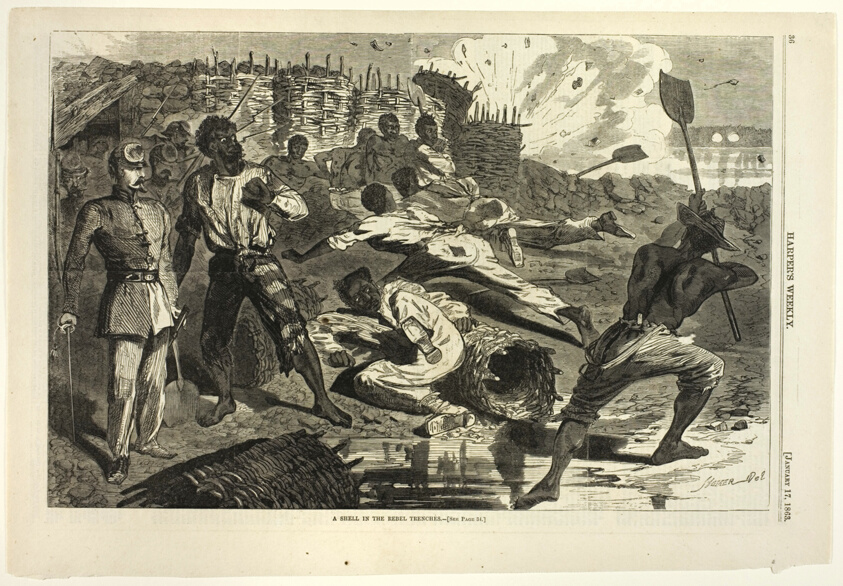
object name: Print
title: A Shell in the Rebel Trenches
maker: Winslow Homer (American, 1836-1910); published by Harper's Weekly (American, 1857-1916)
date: published January 17, 1863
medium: Wood engraving on paper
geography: United States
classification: wood engraving; print; prints and drawing